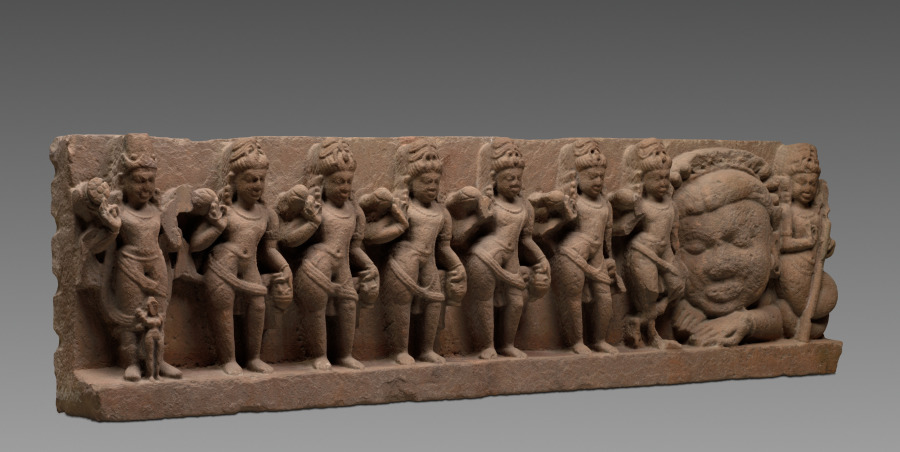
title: Nine Celestial Bodies (Navagraha)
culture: Central India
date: 700s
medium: Sandstone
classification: Sculpture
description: Near temple entrances, the nine celestial bodies were depicted in an orderly row, often in figural form. From left to right they are: Sun with a tall crown and the female Dawn in front of him. The next five figures are nearly identical: Moon, Mercury, Venus, Mars, and Jupiter. As a portent of doom, Saturn was wounded by a goddess to prevent him from moving swiftly, so he stands on one leg. The bodiless head is Rahu, the eclipse, who swallows the moon until it falls out his neck. The serpent-tailed figure is a comet.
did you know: The Sun (Surya) is the only figure who wears boots and holds fully open lotus flowers.